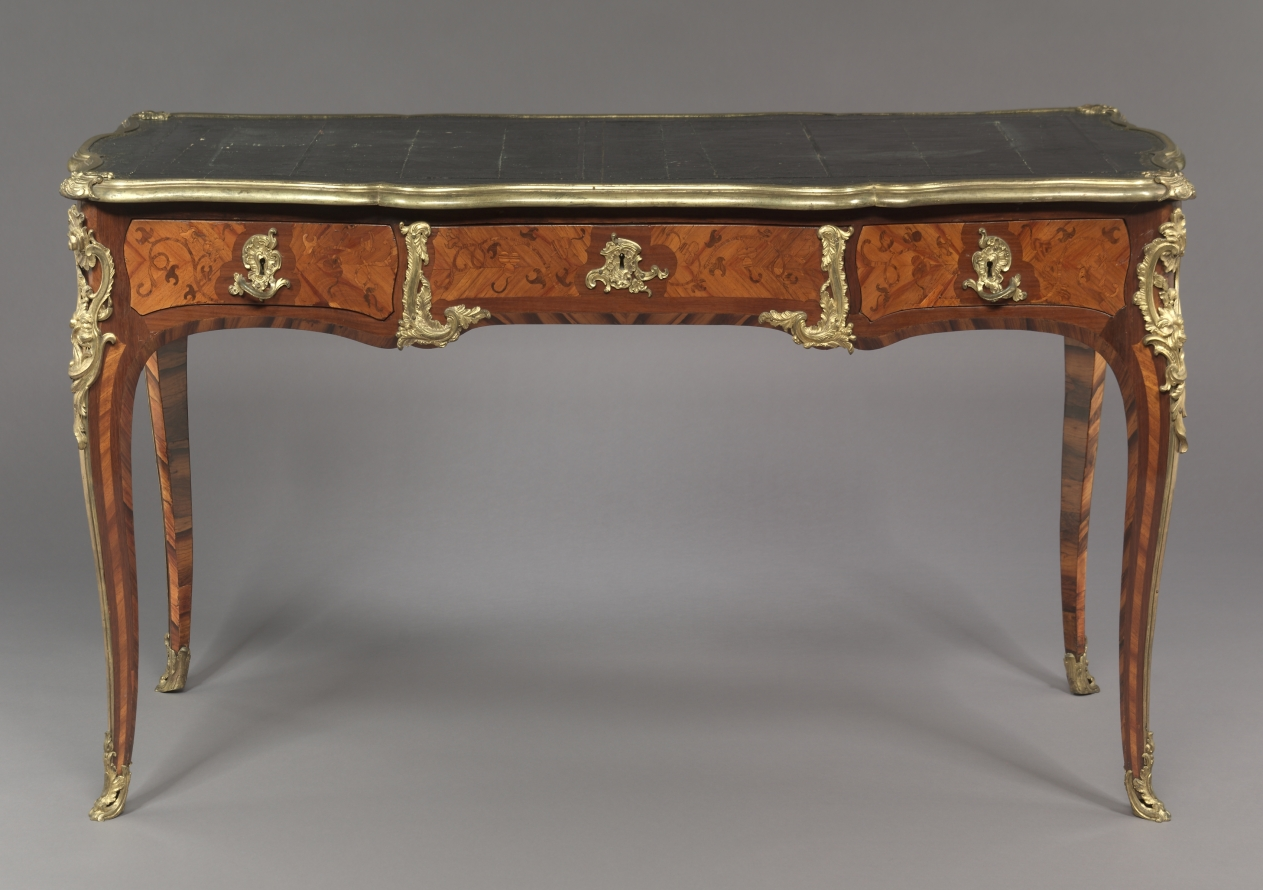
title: Table Desk (Bureau Plat)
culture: France, 18th century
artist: Bernard II van Riesen Burgh (Dutch, 1766)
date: c. 1750– 1760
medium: wood marquetry with gilt bronze mounts, leather top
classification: Furniture and woodwork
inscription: signed three times on bottom edge of apron: B. V. R. B.